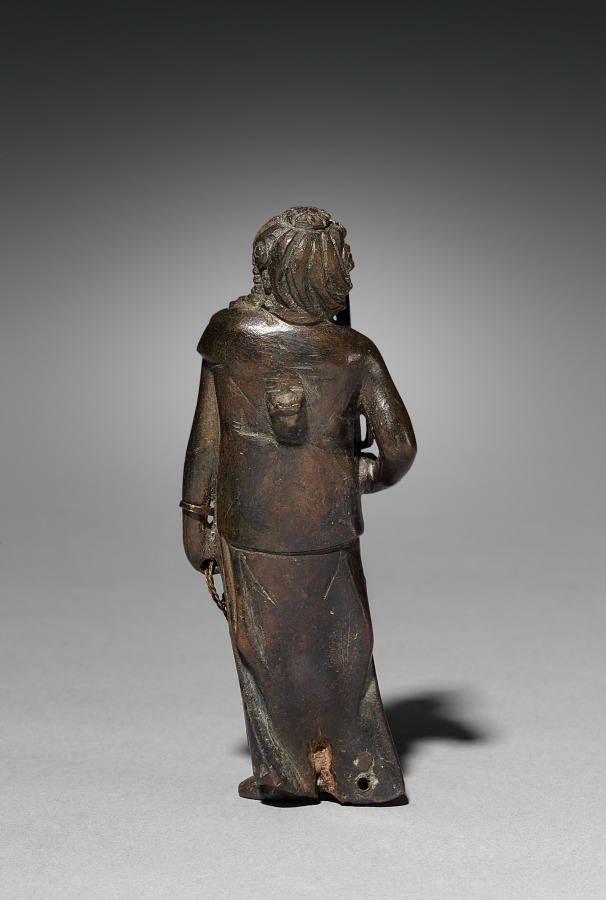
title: Fudō Myōō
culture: Japan, Kamakura period (1185–1333)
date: early 1300s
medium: bronze with wire attachments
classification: Sculpture